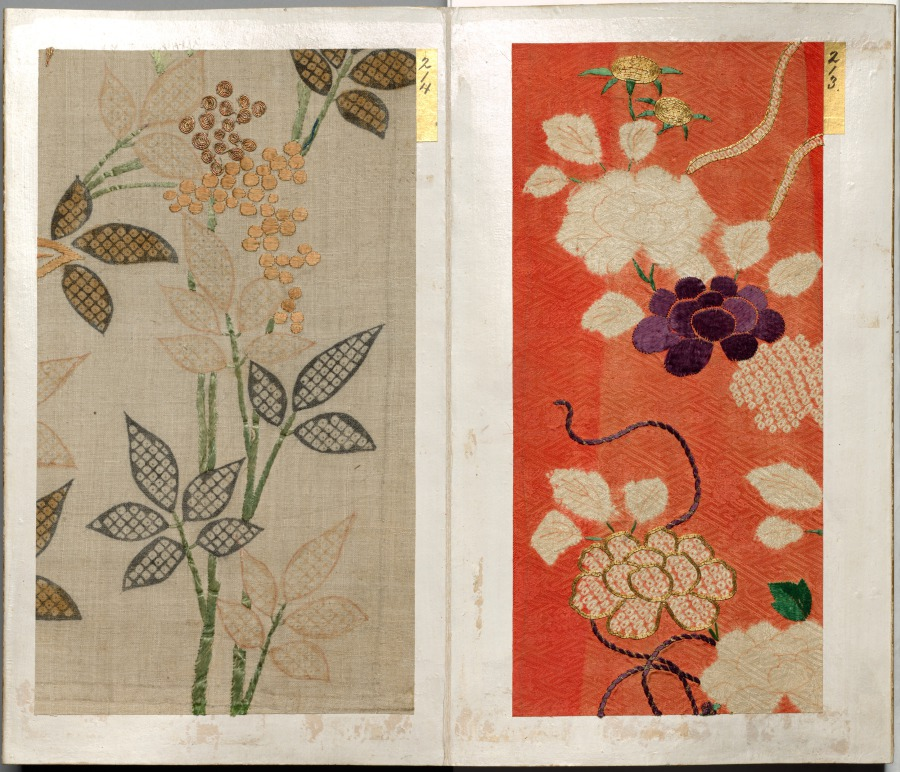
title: Album of Textile Samples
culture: Japan, Edo period (1615–1868)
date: 1600s-1700s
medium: silk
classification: Textile